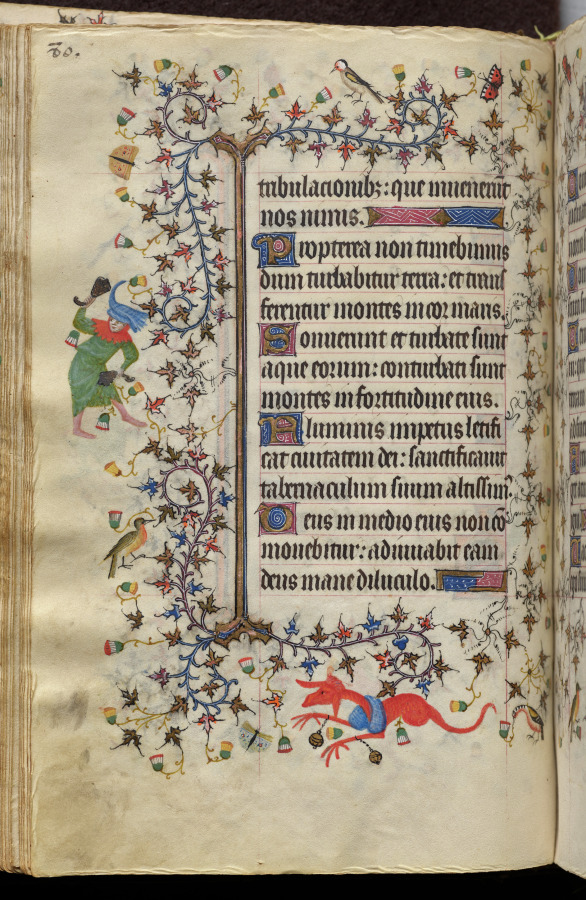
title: Hours of Charles the Noble, King of Navarre (1361-1425): fol. 40v, Text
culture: France, Paris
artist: Master of the Brussels Initials and Associates (French)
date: c. 1405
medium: ink, tempera, and gold on vellum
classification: Bound Volume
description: This precious book was highly prized by its owner, Charles III, King of Navarre, a French-born prince whose coat of arms is painted on 20 folios. Charles visited Paris on numerous occasions and likely acquired this volume there in 1404. Paris was the center of the European book trade at the time and attracted illuminators from many parts of Europe. This manuscript represents one of the most remarkable fusions of French and Italian taste in book illumination. Though conforming to Parisian standards, most of the book’s major miniatures are the work of the Brussels Initials Master, an Italian illuminator who previously worked in Bologna and Padua.